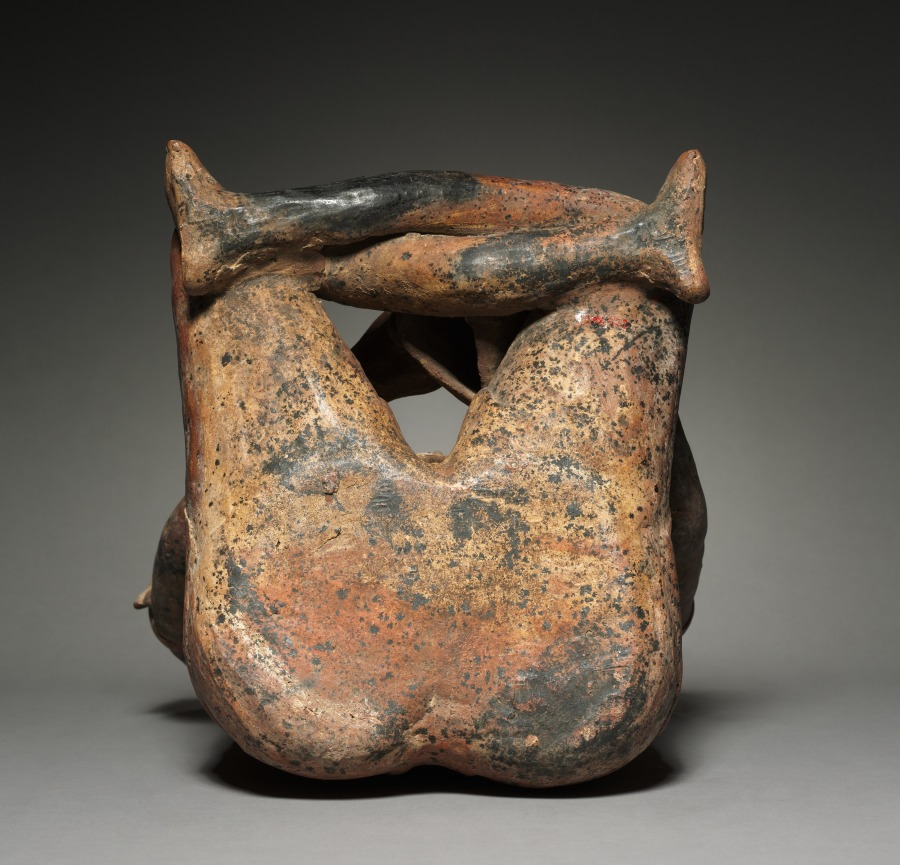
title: Male Seated Figure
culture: Mexico, Nayarit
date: 100 BCE–300 CE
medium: ceramic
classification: Ceramic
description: This couple-extremely fine examples of their kind-may commemorate the marriage of an important person, such as a chief, but could also represent siblings of a chiefly family. Whatever their relationship, their unity is conveyed by their physical similarities, including their jewelry, which marks high social station. The female is unusual in nursing an infant, likely a reference to generational renewal and the continuation of noble bloodlines. The significance of the male’s activity-beating a turtle-shell drum- is not understood.